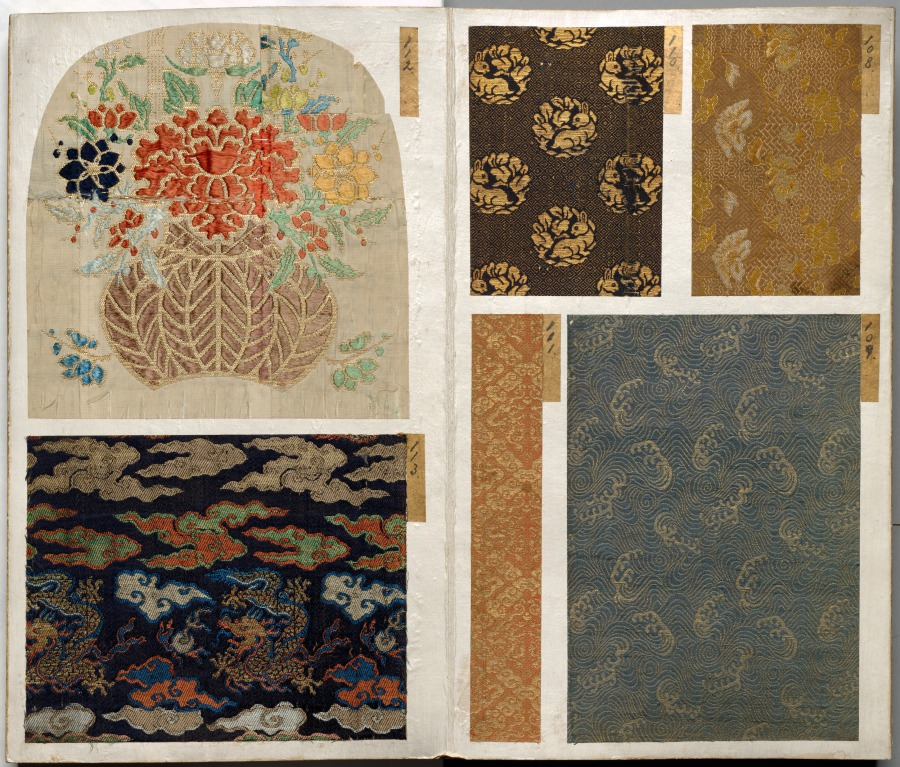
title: Album of Textile Samples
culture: Japan, Edo period (1615–1868)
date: 1600s-1700s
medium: silk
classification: Textile